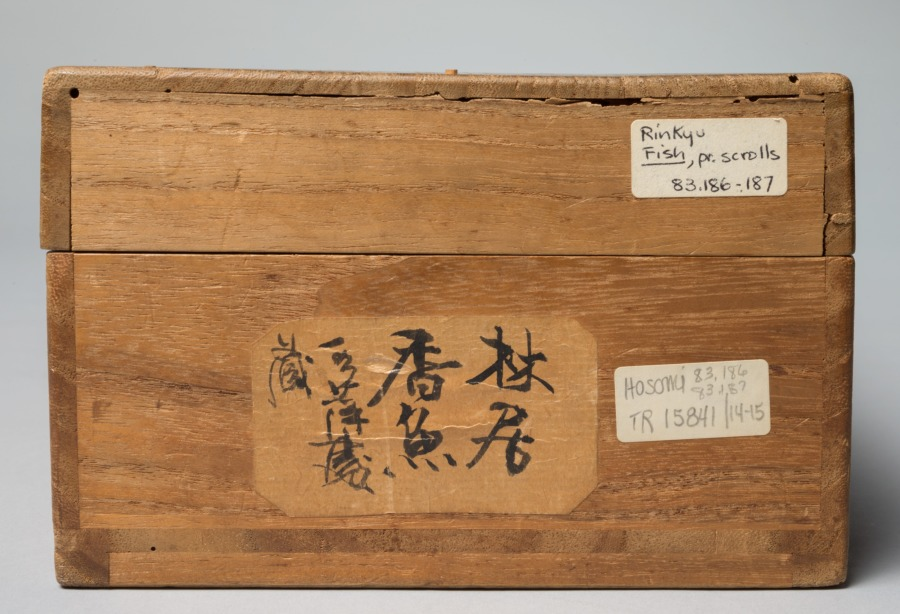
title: Fish and Rock; Fish and Seaweed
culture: Japan, Momoyama period (1573–1615)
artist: Rinkyo (Japanese)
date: 1573–1615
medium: pair of hanging scrolls; ink on paper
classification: Painting